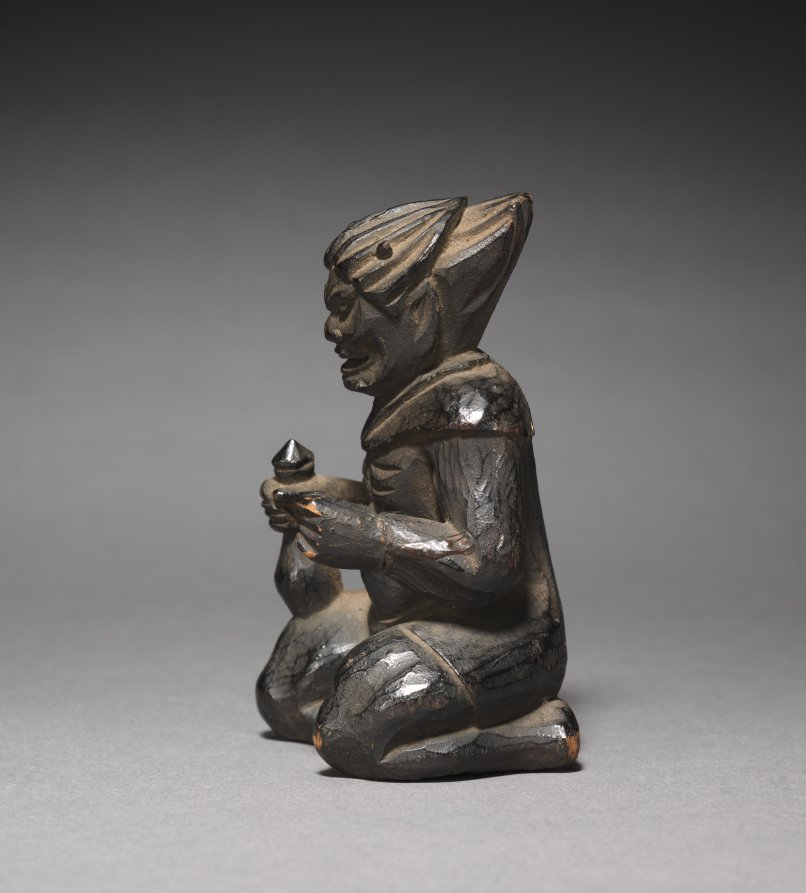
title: En no Gyōja with Zenki and Kōki (Kōki)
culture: Japan, Edo period (1615–1868)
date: 1615–1868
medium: wood and paint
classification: Sculpture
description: This is one of a trio of figures identified as Enno Gyoja and his two attendants, Zenki and Koki. The set follows the iconography of Shugendo, the traditional mountain ascetic practice in Japan. Enno Gyoja is depicted as a hermit-monk, seated on a rock attached to a modern base. He holds a staff in his right hand and a sutra in the left. The two attendants take the form of half-human, half-demonic figures and are regarded as a married couple.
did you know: Koki carries a sake bottle.